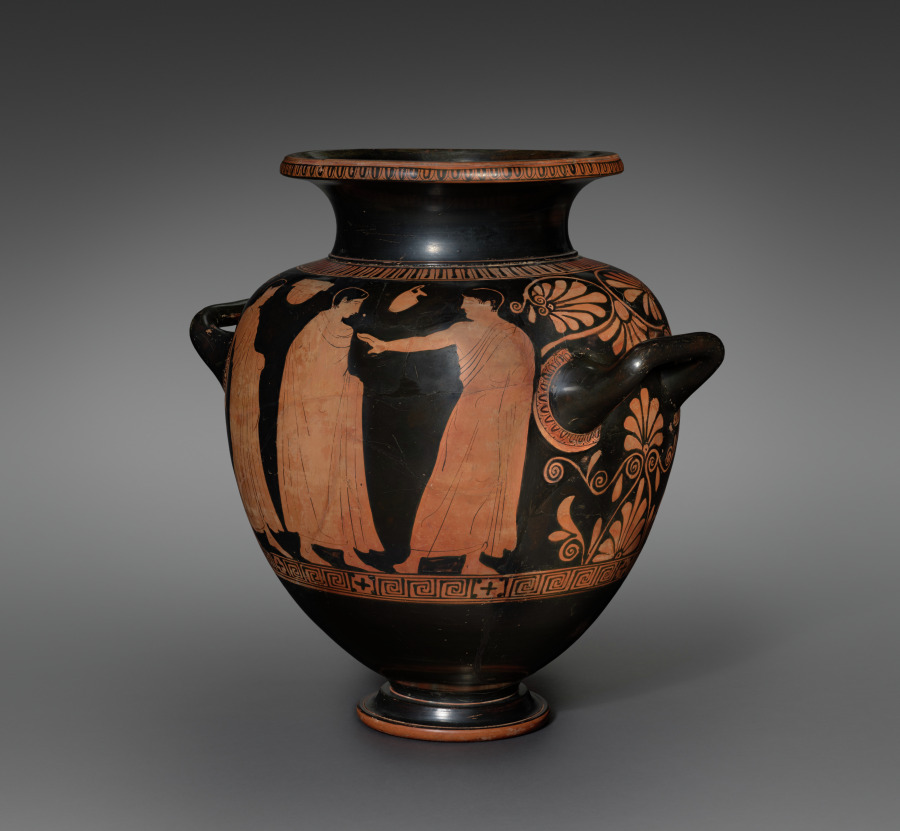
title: Red-Figure Stamnos (Mixing/Storage Vessel): Komos (Musicians and Revelers)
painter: attributed to Kleophon Painter (Greek, Attic, active c. 440–410 BCE)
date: c. 435–425 BCE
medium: Ceramic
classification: Ceramic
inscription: Κ Α Λ Ο Σ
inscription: Κ Α Λ Ο [Σ]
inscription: black '080'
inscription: black 'WF2'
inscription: black '0.19'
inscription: red '09.6'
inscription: partially removed red and white sticker, with number blacked out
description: Four lively figures move to the right across the front side of this stamnos, a vase used for storing and mixing wine. First comes a finely dressed woman playing the pipes, followed by three male figures, all nearly nude. The bearded one holds a drinking cup and reaches back, perhaps dancing, while the last in line concentrates on the music of his lyre.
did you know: The Athenian stamnos, a shape favored by the Etruscans, was made primarily for export.